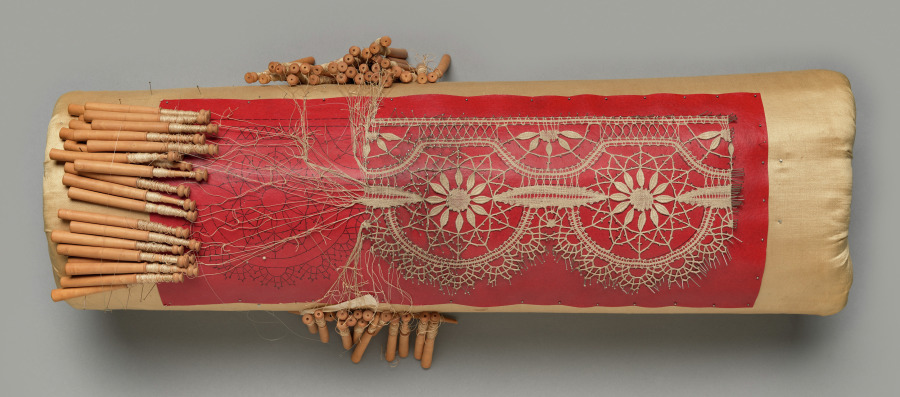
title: Lace Pillow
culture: Spain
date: 1800s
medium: Bobbin lace (torchon lace) pillow; paper, pins, wood bobbins, linen thread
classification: Lace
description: Spanish bobbin lace is made on a cylindrical straw-stuffed bolster pillow of a size and shape like this one. Further evidence of a Spanish origin is the shape and materials of the handmade bobbins (boxwood in this case). The lace maker would have sat with one short end of the pillow (the end with the bobbins) in her lap and the other end propped against a table. A pattern (pricking) on red card stock is pinned to the pillow around the perimeter. Linen thread is wound on the boxwood bobbins. To create this Torchon lace edging, the thread on the bobbins is crossed and twisted to create a connection. A pin is then placed in the pillow to correctly space each connection. Once complete, the pins are removed, and the bobbin lace separated from the pillow. The 15.2 cm (6-inch) wide piece of Torchon lace edging created on this pillow is a common type of lace, easy and fast to make. It has leaf-shaped tallies. The foot side (straight edge) of the Torchon lace edging on this pillow would have been sewn to the edge of a garment or a furnishing fabric. The scalloped edge is referred to as the headside of this Torchon lace.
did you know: The boxwood bobbins are handmade. At one point, these boxwood bobbins were cut off, perhaps to use them for another piece of lace, and have since been reknotted to the linen thread on this bobbin lace pillow.